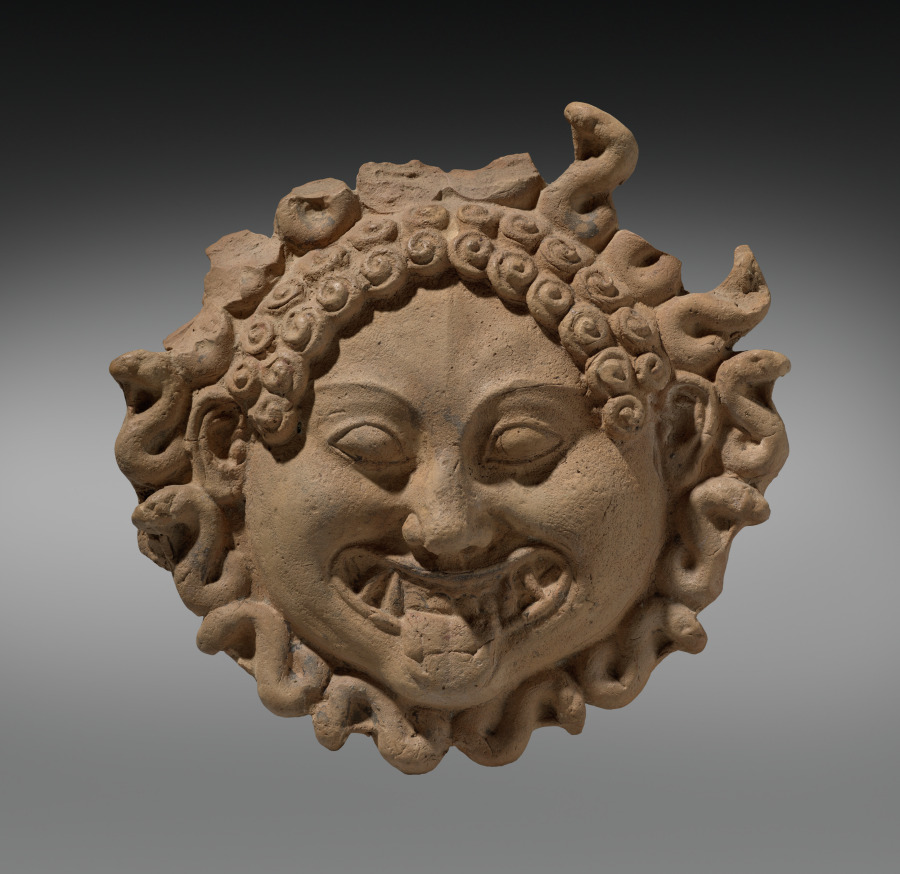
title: Gorgoneion Antefix (Ornamental Roof Tile)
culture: Greek / South Italian, Taranto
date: c. 500 BCE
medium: Terracotta (moldmade)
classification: Ceramic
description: This mold-made terracotta antefix, a type of ornamental roof tile, takes the form of a Gorgoneion, a disembodied Gorgon head. Nearly circular in shape, it features bulging, almond-shaped eyes and a grinning mouth with wide tongue and sharp teeth or tusks. S-shaped serpents surround the head, some standing tall. Traces of pigment suggest a more vivid original appearance, perhaps considered both terrifying and protective.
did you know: The Gorgoneion represents the decapitated head of Medusa, most famous of the three Gorgon sisters.